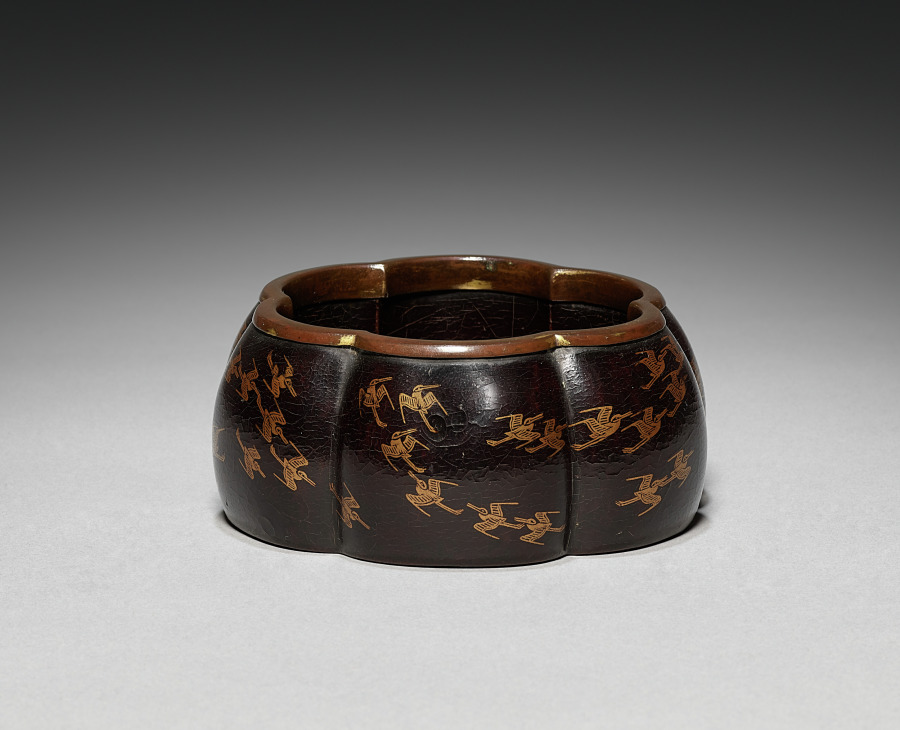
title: Incense Burner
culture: Japan, Nanbokuchō period (1336–92)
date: late 1300s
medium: black lacquer on wood with decoration in maki-e; metal rims; bronze lid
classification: Lacquer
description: This container's repeated, undulating, rounded sides evoke waves over which the articulated plovers sweep. The bronze cover (probably a later addition) mimics the design of a fishing weir. Overall, the container brings to mind the seashore. The earthy quality of the lacquered surface demonstrates the interaction between a man-made pattern (the plovers) and the somewhat unexpected surface of a natural material such as wood.